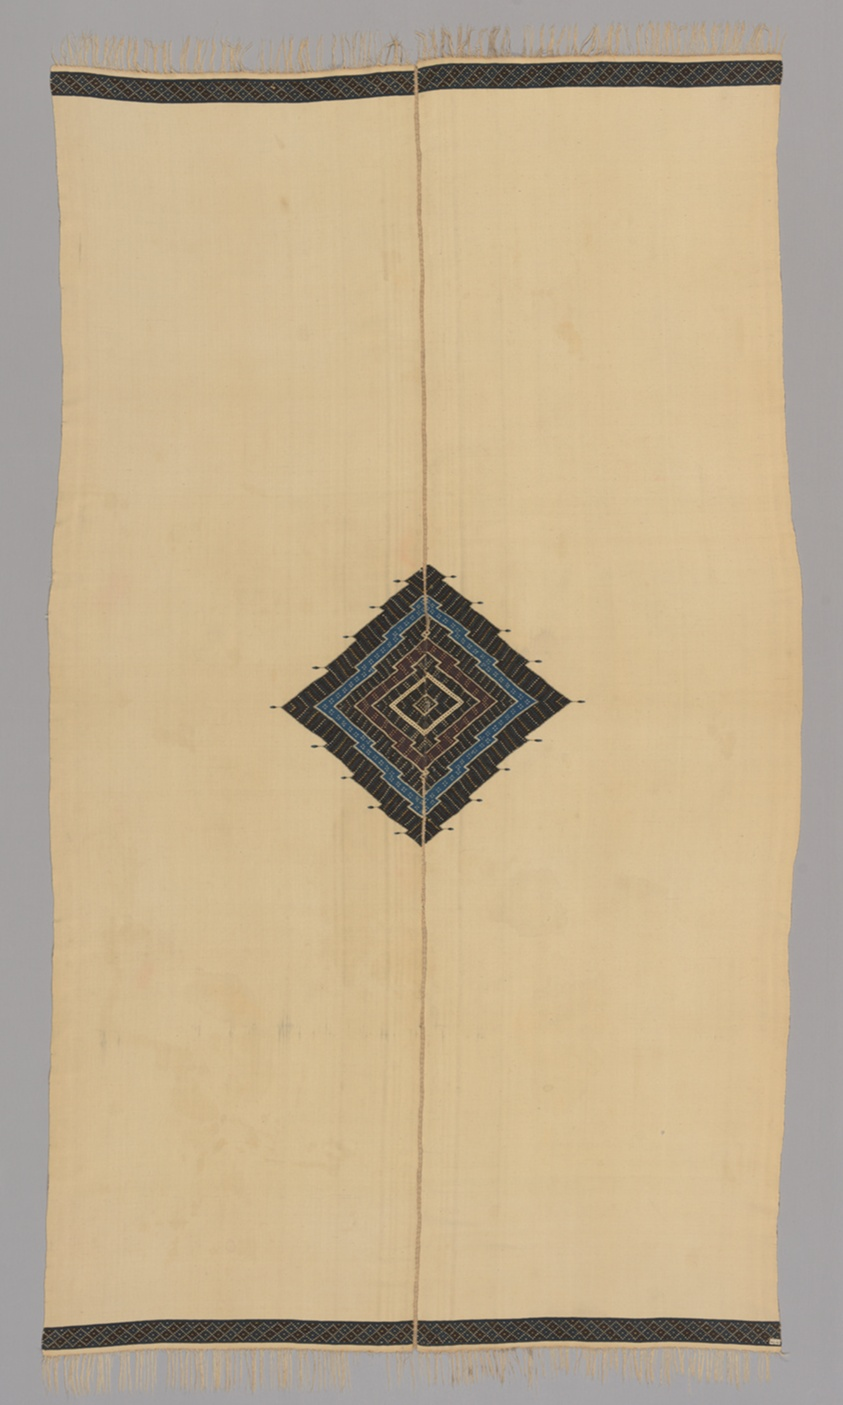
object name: Textile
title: Sarape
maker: Saltillo, Mexico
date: before 1800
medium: Cotton and wool, tapestry weave; joined with cotton, needle-made knotted insert; plied and knotted warp fringe; two loom widths joined; all selvages present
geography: Saltillo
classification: textile; weaving; needlework (visual works); costume; dress (garment); clothing